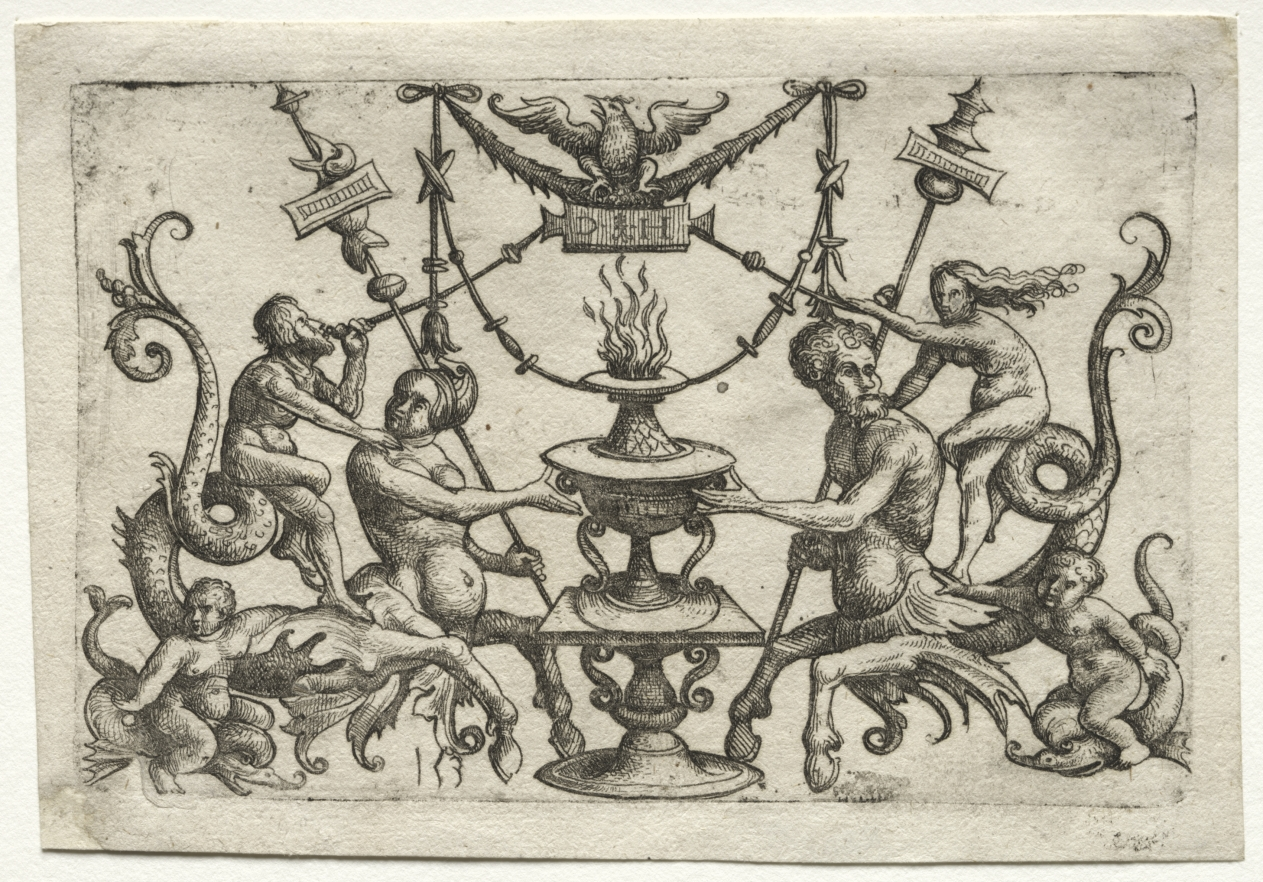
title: Ornament with Siren and Triton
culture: Germany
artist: Daniel Hopfer (German, c. 1470–1536)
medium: etching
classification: Print